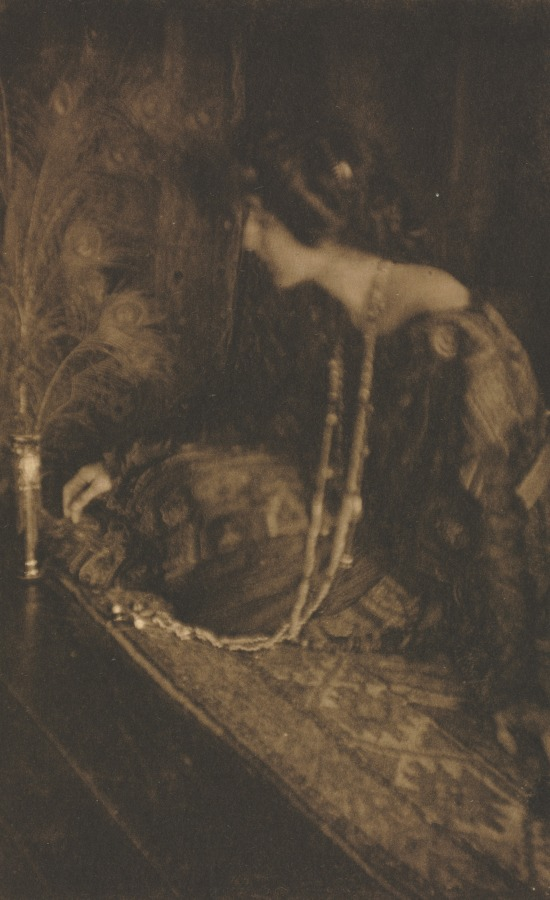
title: Camera Work: Lenore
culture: America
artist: Joseph T. Keiley (American, 1969–1914)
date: 1907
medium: photogravure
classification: Bound Volume